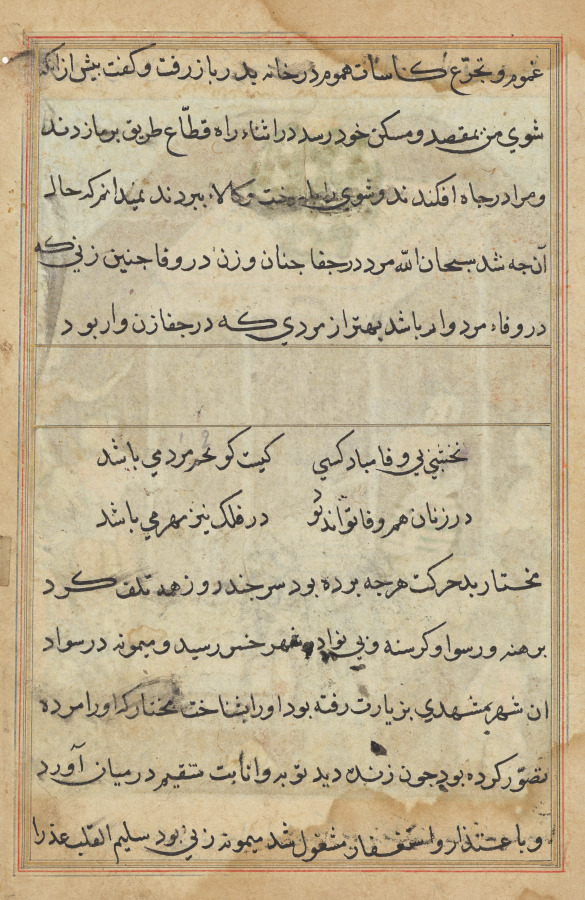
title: Page from Tales of a Parrot (Tuti-nama): text page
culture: Mughal India, court of Akbar (reigned 1556–1605)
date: c. 1560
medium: gum tempera, ink, and gold on paper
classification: Painting